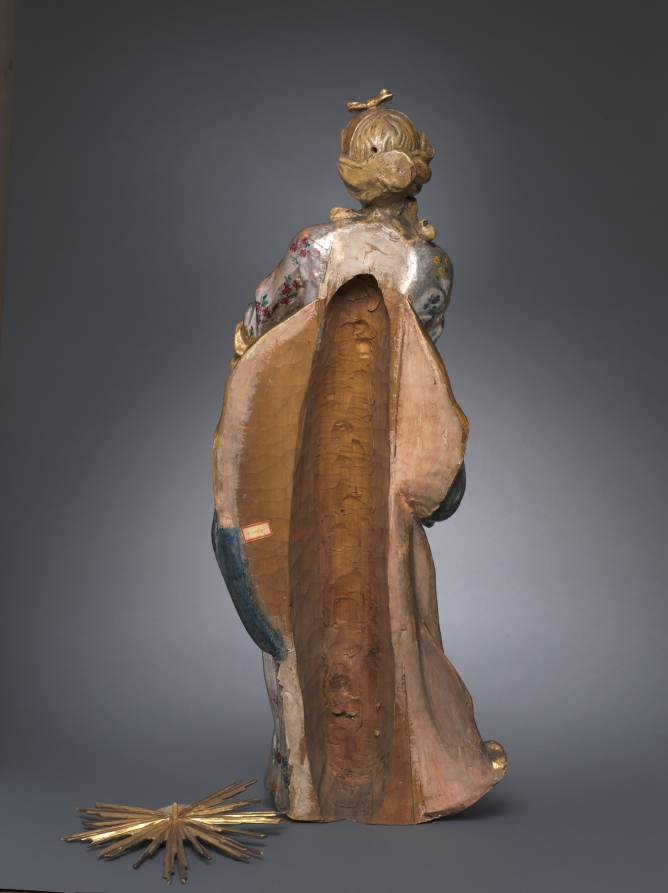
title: Virgin Mary as a Child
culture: Austria, Vienna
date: 1750–75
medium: painted and gilded wood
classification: Sculpture